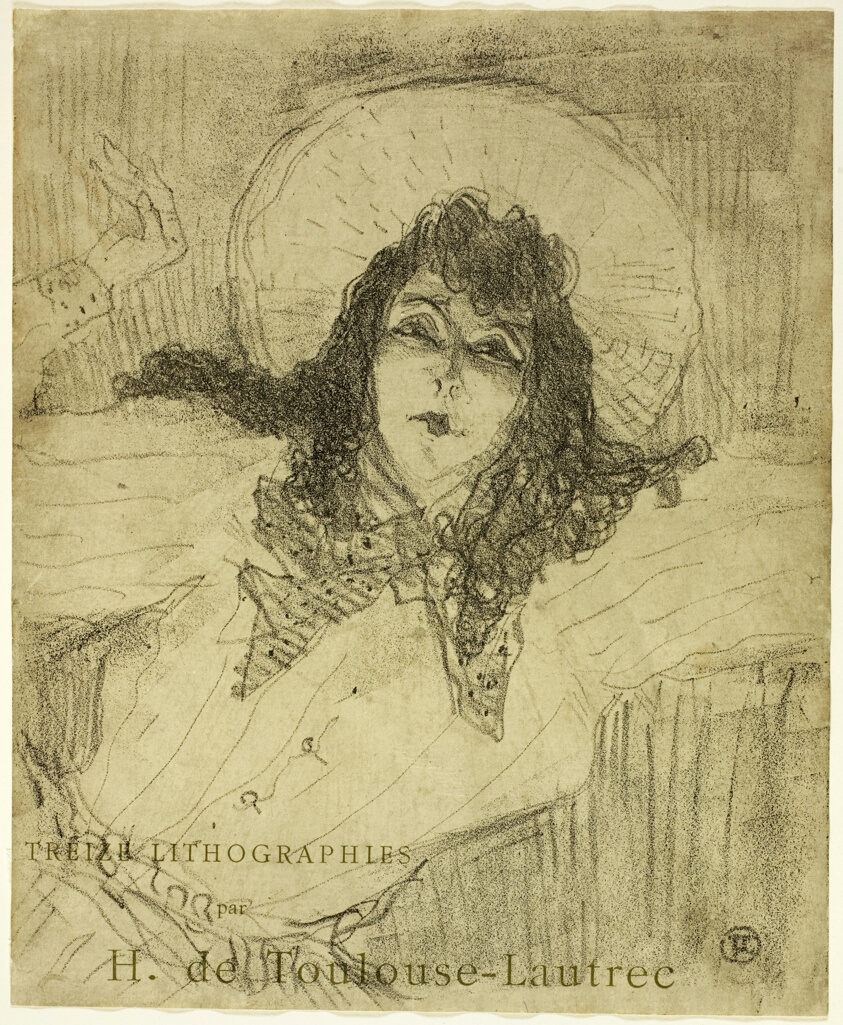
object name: Print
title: May Belfort, from Treize Lithographies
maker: Henri de Toulouse-Lautrec (French, 1864-1901)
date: 1898, published before 1906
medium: Color lithograph on cream wove paper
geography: France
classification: lithograph; print; prints and drawing